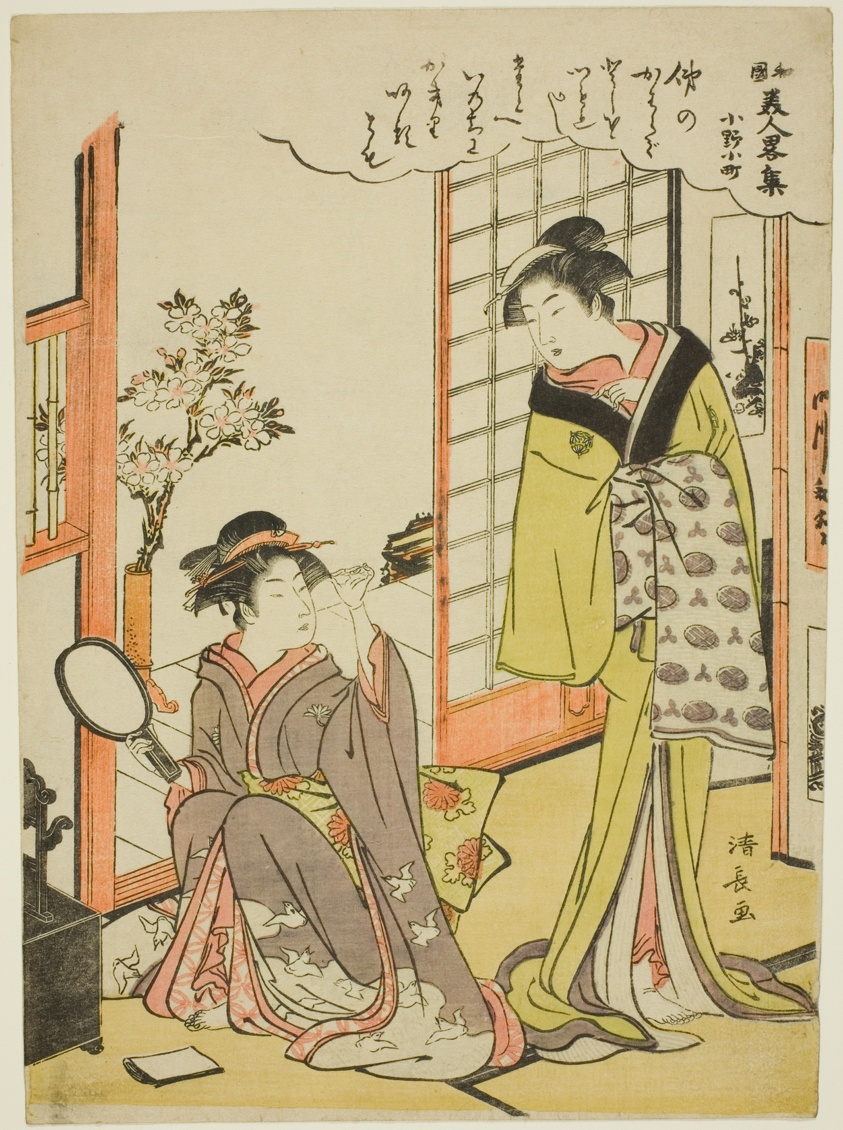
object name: Print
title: Ono no Komachi, from the series A Collection of Fashionable Beauties of Japan (Wakoku bijin ryaku shu)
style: Japanese (culture or style)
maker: Torii Kiyonaga (Japanese, 1752-1815)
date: Edo period (1615–1868), n.d.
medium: Color woodblock print; chuban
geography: Japan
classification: woodblock print; print; asian art